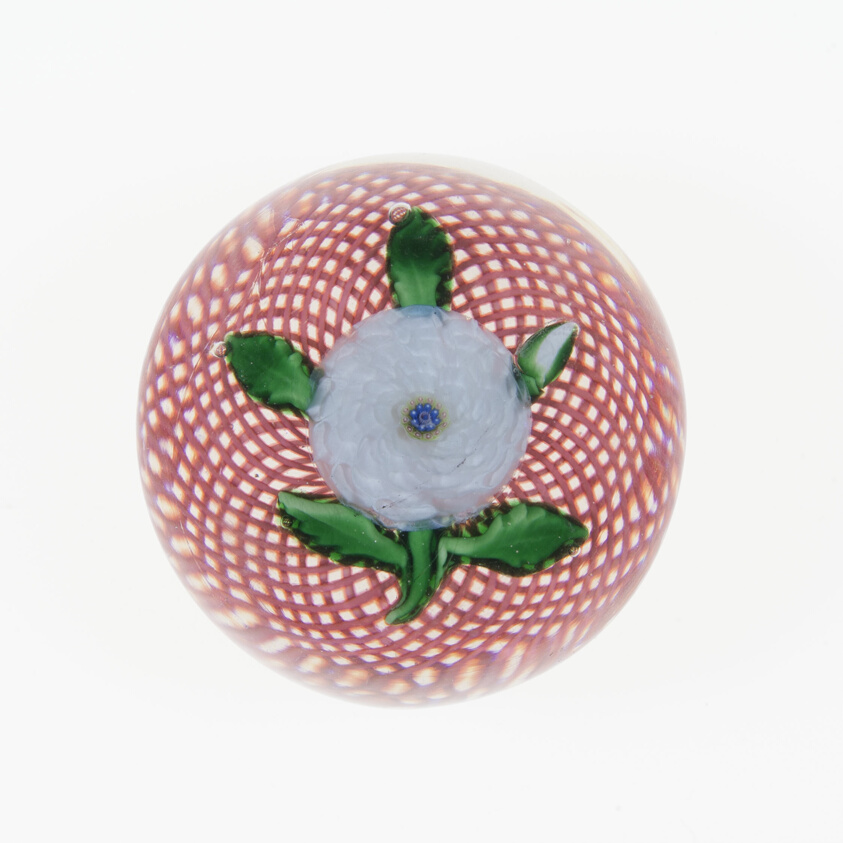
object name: Glass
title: Paperweight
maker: Saint-Louis Glassworks (Cristalleries de Saint-Louis); Lorraine, France, founded 1586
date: c. 1845/60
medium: Glass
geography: Saint-Louis-lès-Bitche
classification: paperweight; glass